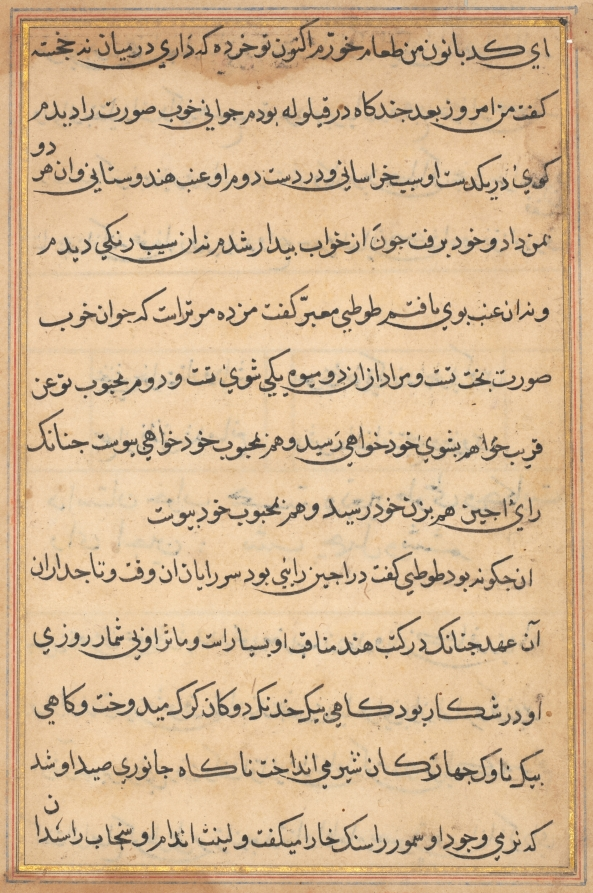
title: Page from Tales of a Parrot (Tuti-nama): text page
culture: Mughal India, court of Akbar (reigned 1556–1605)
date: c. 1560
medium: gum tempera, ink, and gold on paper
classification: Painting